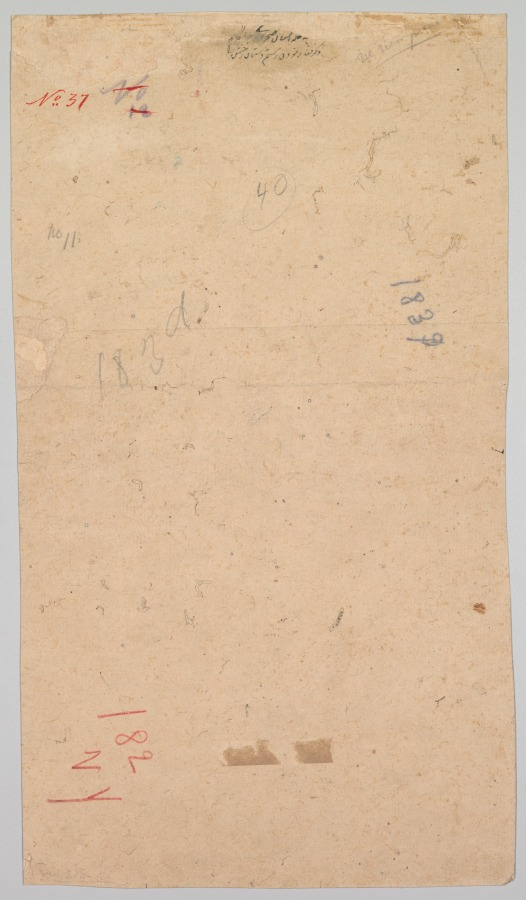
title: A marbled picture of Rustam catching Rakhsh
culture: India, Bijapur, Deccan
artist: attributed to Shafi (Indian, active about 1650)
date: c. 1650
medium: Gum tempera and gold on paper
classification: Painting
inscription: apocryphal inscription lower left: 'amal-i mir Kalan 904 verso: inscription identifying the scene of Rustam capturing Rakhsh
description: This scene depicts the young hero Rustam catching a foal, Rakhsh (meaning “light”), who will be his faithful companion through many adventures. A prophet-like shepherd figure with a staff at the upper left predicts that Rustam will be the savior of Iran. At the top of the page a feline has caught its prey, while a hunter steps on its tail. This extraordinary painting has more applications of marbled colorant than any other known example. Even all the flowers and birds have been articulated through marbling in a feat of registration and control by a master of the technique.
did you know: Even the flowers and insects used as filler in this composition were marbled.